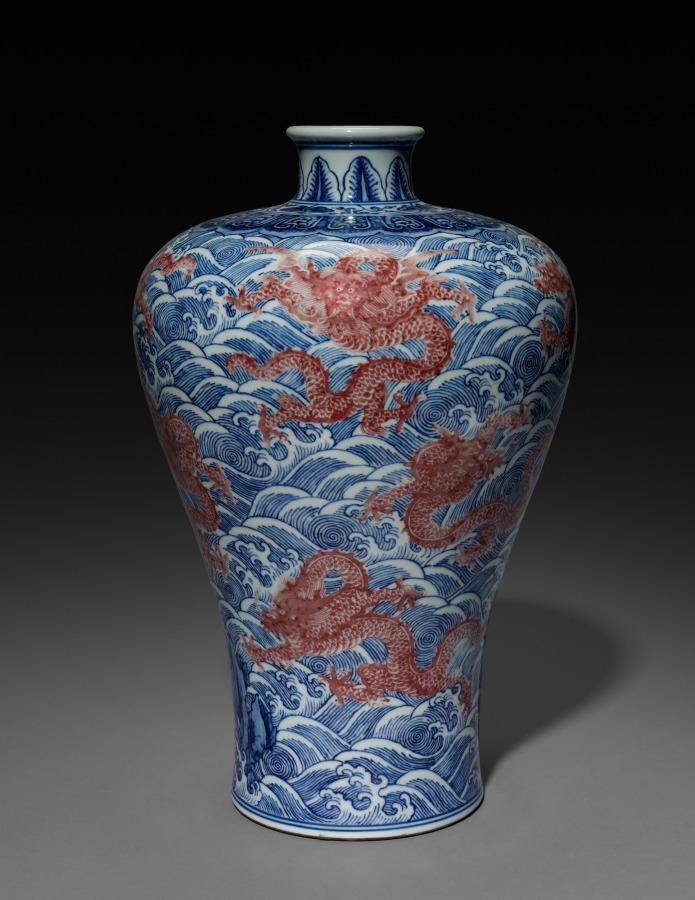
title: Bottle Vase with Dragons and Waves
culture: China, Jiangxi province, Jingdezhen kilns, Qing dynasty (1644-1911), Qianlong mark and reign (1736-95)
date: 1736–95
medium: Porcelain decorated in underglaze cobalt blue and copper red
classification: Ceramic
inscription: 大清乾隆年制